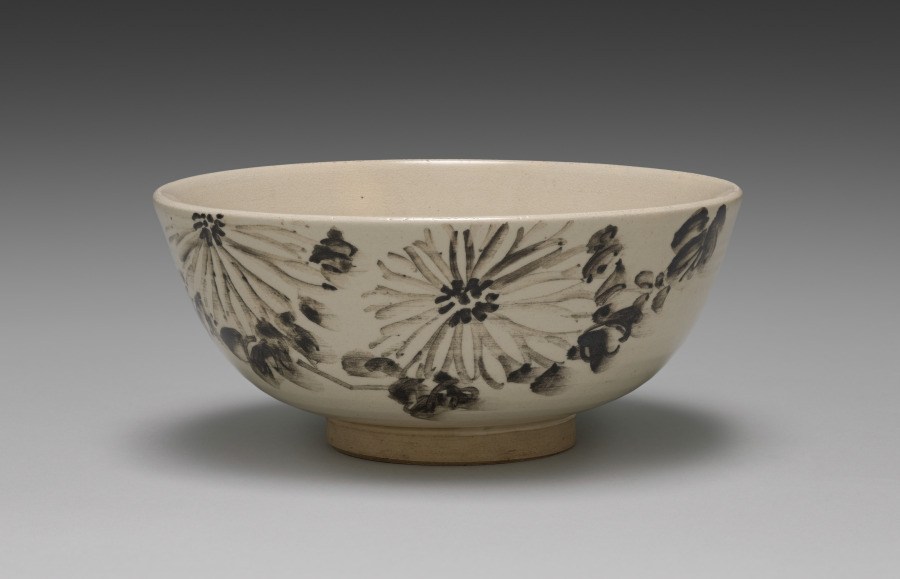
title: Bowl with Chrysanthemums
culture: Japan, Taishō period (1912–26) or Shōwa period (1926–89)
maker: Seifū Yohei IV (Japanese, 1872–1951)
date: 1914–46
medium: Stoneware with underglaze iron oxide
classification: Ceramic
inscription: 清風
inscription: 菊画/ 鉢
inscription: The inside of the box lid has a seal indicating that the bowl was included in a renewal opening of the gallery Manjudo in Tokyo.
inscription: 清風造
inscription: 成山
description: The chrysanthemums in underglaze iron oxide of this bowl of Kyoto ware have a casual feel, which is emphasized by the bowl's shape. When held, the its slightly ridged body would gently massage one’s palms, contributing to the sensory, tactile experience of the piece and possibly generating a sense of comfort and ease. The inside of the box lid has a seal indicating that the bowl was included in a renewal opening of the gallery Manjudo in Tokyo.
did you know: Stoneware works of this type are classified as Kyoto ware, after the city where the style developed.